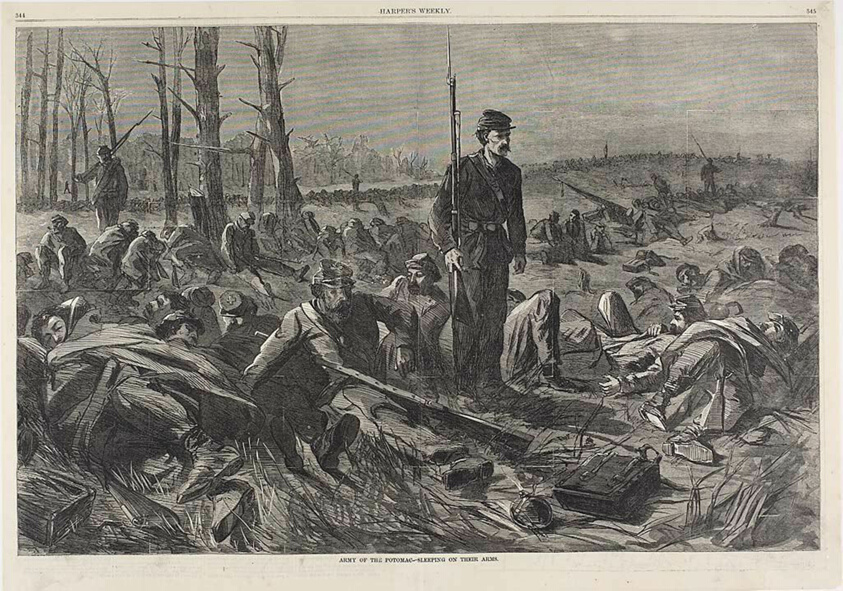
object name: Print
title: Army of the Potomac—Sleeping on Their Arms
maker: Winslow Homer (American, 1836-1910); published by Harper's Weekly (American, 1857-1916)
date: published May 21, 1864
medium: Wood engraving on paper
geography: United States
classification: wood engraving; print; prints and drawing